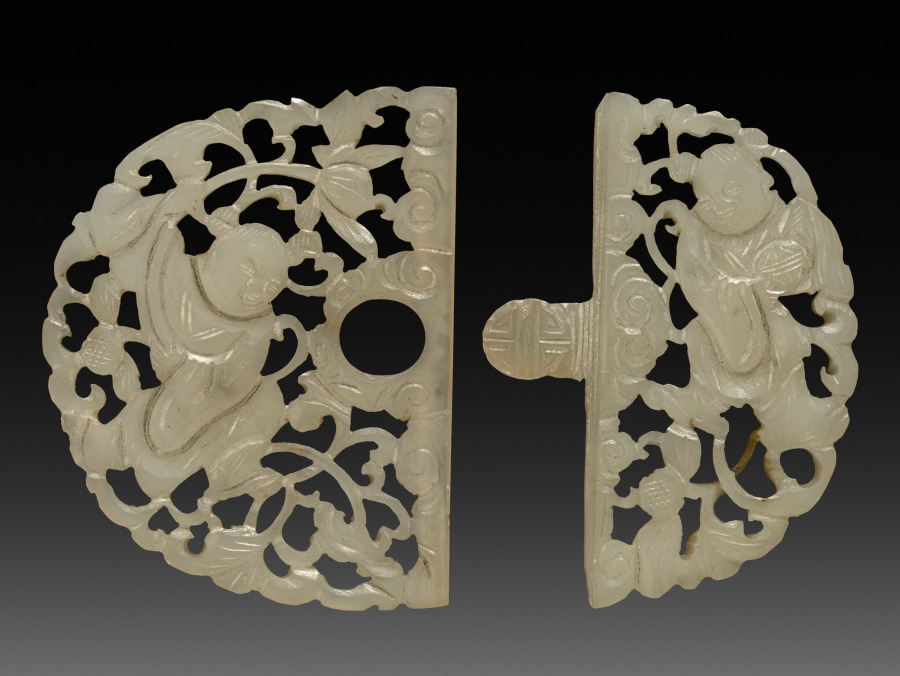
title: Buckle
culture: China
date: 1800s–1900s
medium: white jade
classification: Jewelry